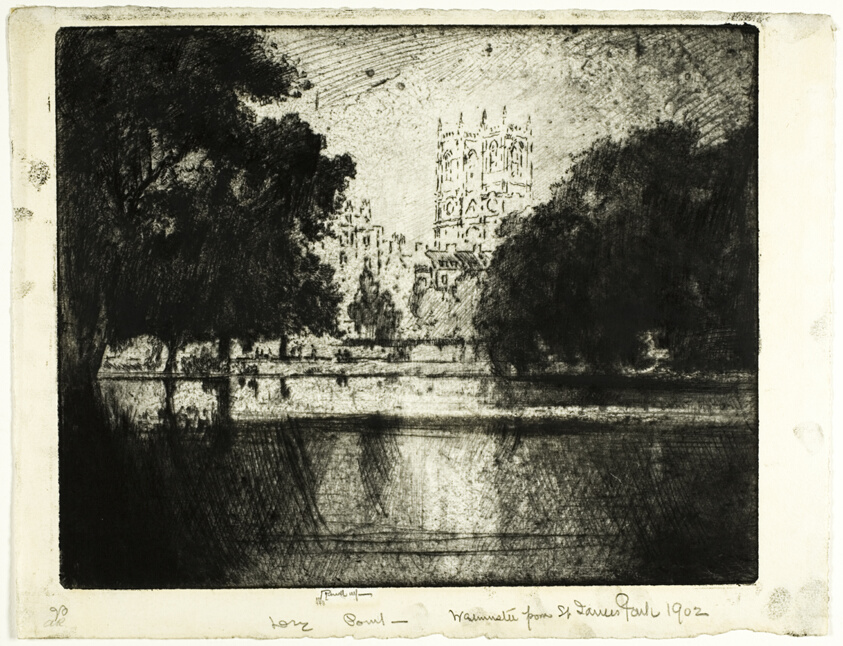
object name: Print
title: Westminster's Towers, from Saint James Park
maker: Joseph Pennell (American, 1857-1926)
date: 1905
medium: Drypoint on ivory wove paper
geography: United States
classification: drypoint; print; prints and drawing